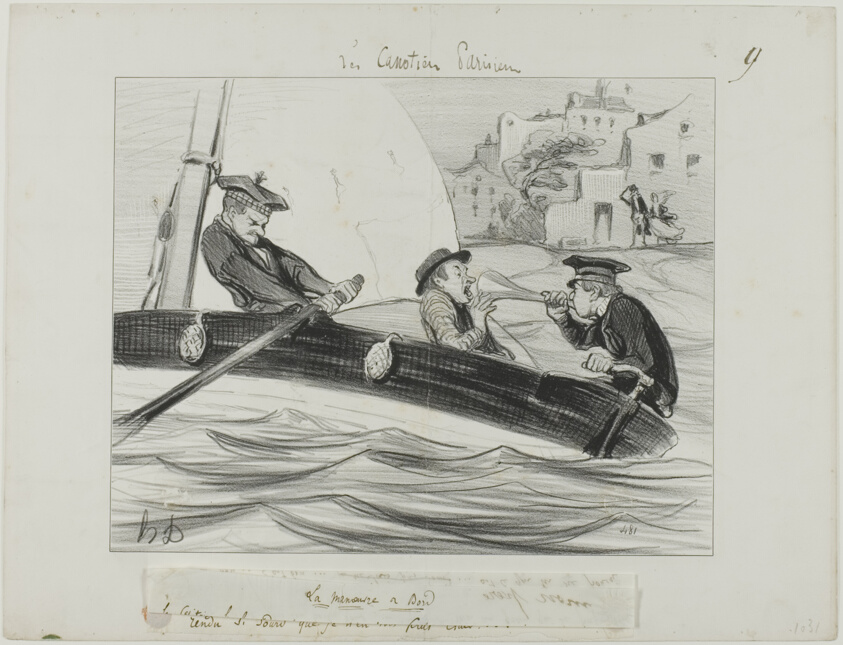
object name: Print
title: A Boat Maneuver, plate nine from Les Canotiers Parisiens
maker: Honoré-Victorin Daumier (French, 1808-1879)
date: 1843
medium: Lithograph in black, with additions in pen and brown ink (faded to gray) and caption in pen and brown ink, on ivory wove paper, tipped onto ivory wove paper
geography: France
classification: lithograph; print; prints and drawing